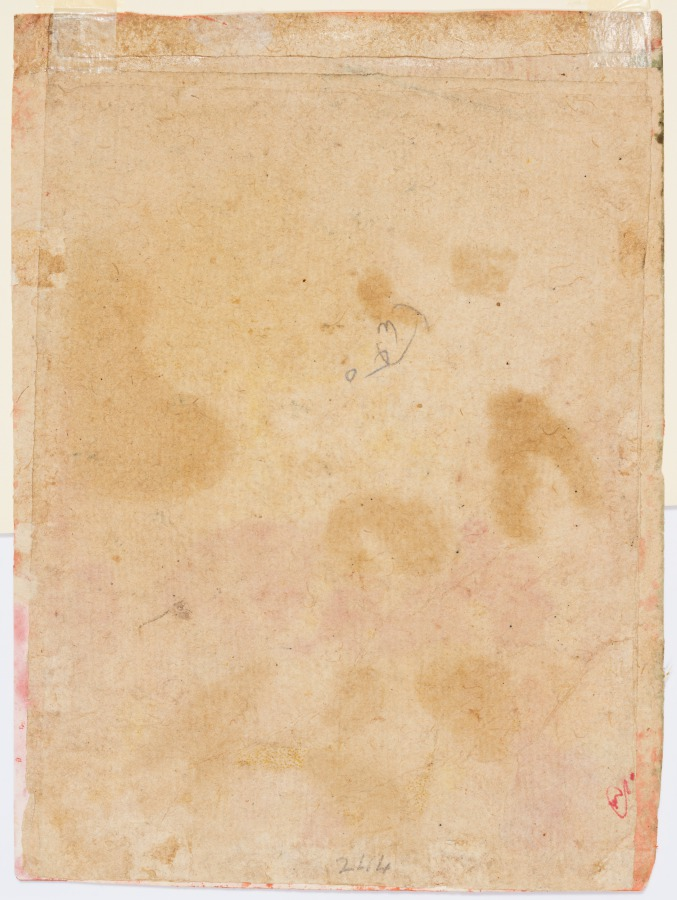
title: A Woman Charms Snakes in the Wilderness: Asavari Ragini, from a Ragamala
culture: Northwestern India, Rajasthan, Rajput Kingdom of Sirohi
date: early 1700s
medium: gum tempera and gold on paper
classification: Painting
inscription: āsāvarī rāgīnī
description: Wearing a blouse and skirt made of leaves, the heroine retains her jewelry and diaphanous veil. She speaks to a snake, and others approach, charmed by her beauty. The multiple colors used for the rocks add to the otherworldly quality of the scene, and even they seem drawn to her spiritual magnetism.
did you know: Unafraid, she offers a flower to one cobra and allows another to wind its way up her leg.